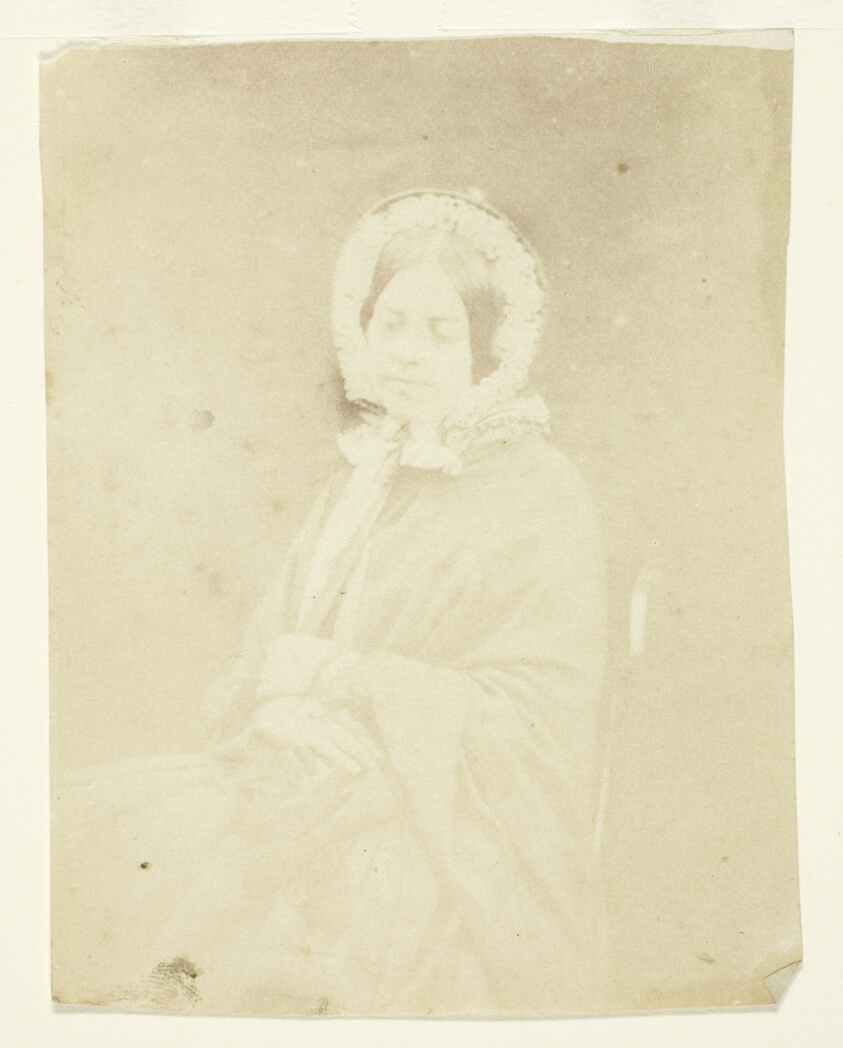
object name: Photograph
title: Mrs. Craik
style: 19th century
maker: Artist unknown, possibly Benjamin Mulock (English, 1829–1863); English, 19th century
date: 1850/59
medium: Calotype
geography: England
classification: salted paper print; photographic process; photography; photograph